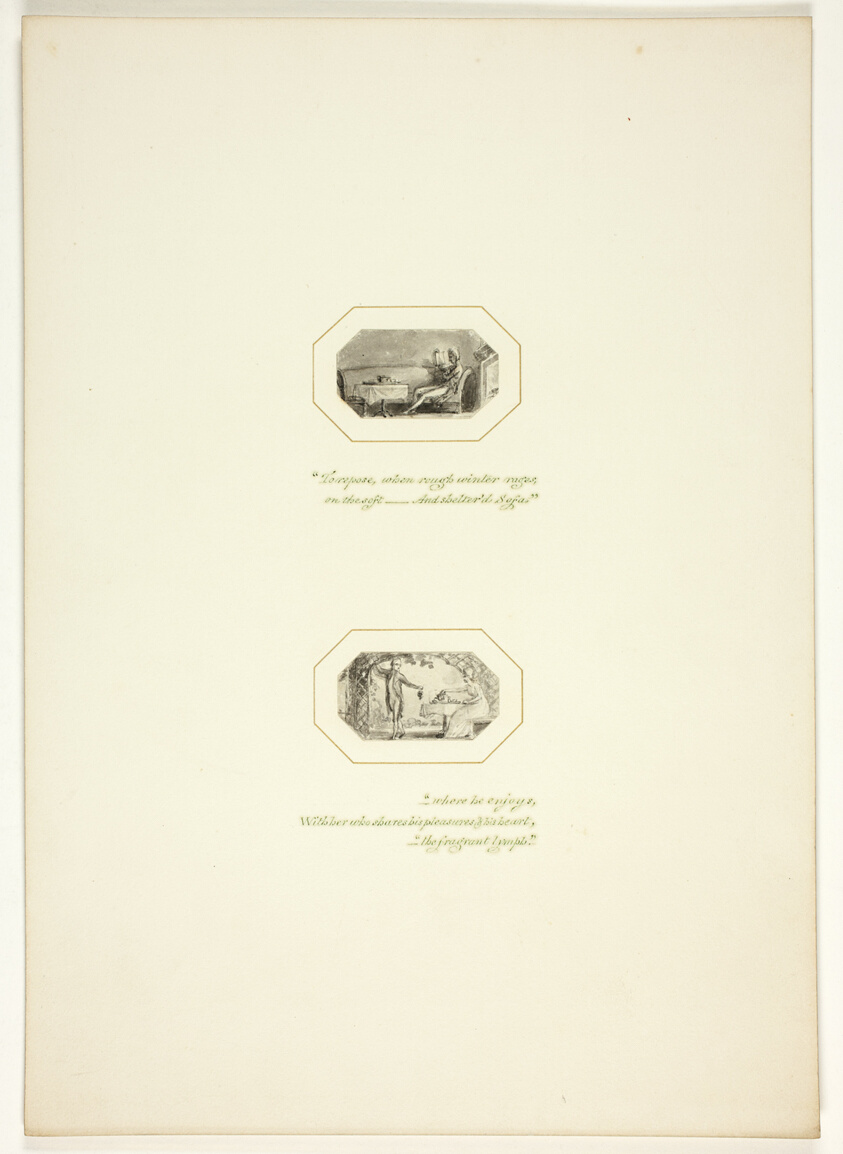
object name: Drawing and Watercolor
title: Study for a plate from The Task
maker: Thomas Stothard (English, 1755-1834)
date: c. 1800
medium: Ink wash on paper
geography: England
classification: ink or chalk wash; drawings (visual works); prints and drawing